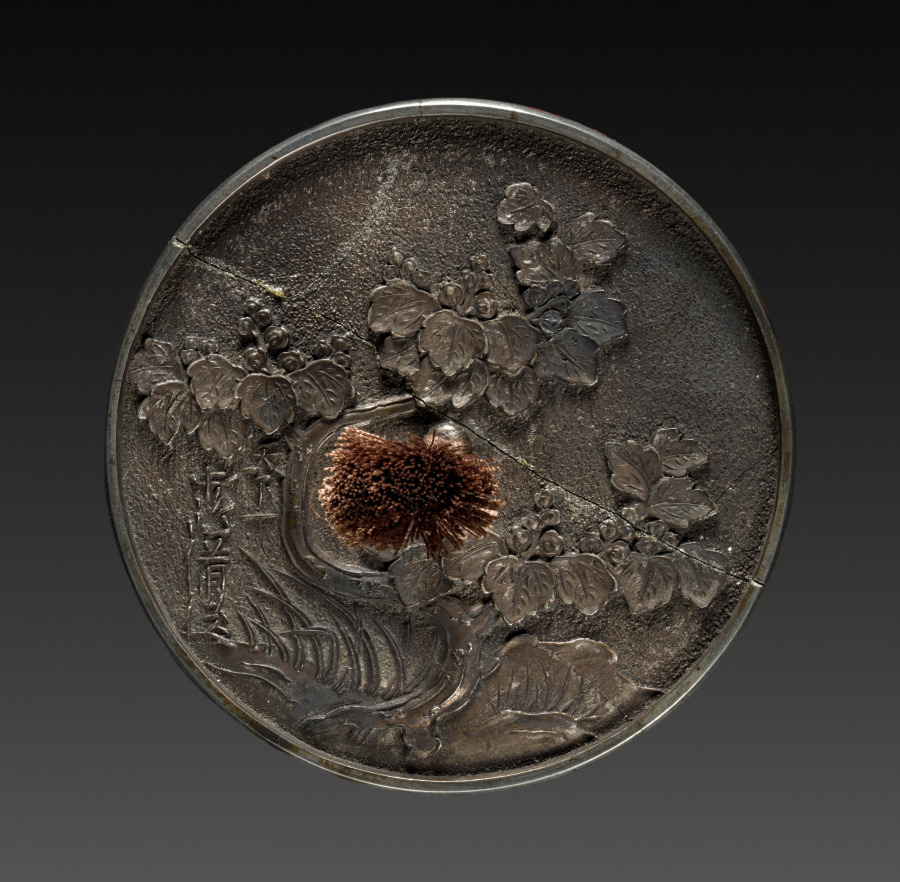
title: Mirror with Paulownia Tree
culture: Japan, Muromachi period (1392–1573)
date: 1392–1573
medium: bronze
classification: Metalwork